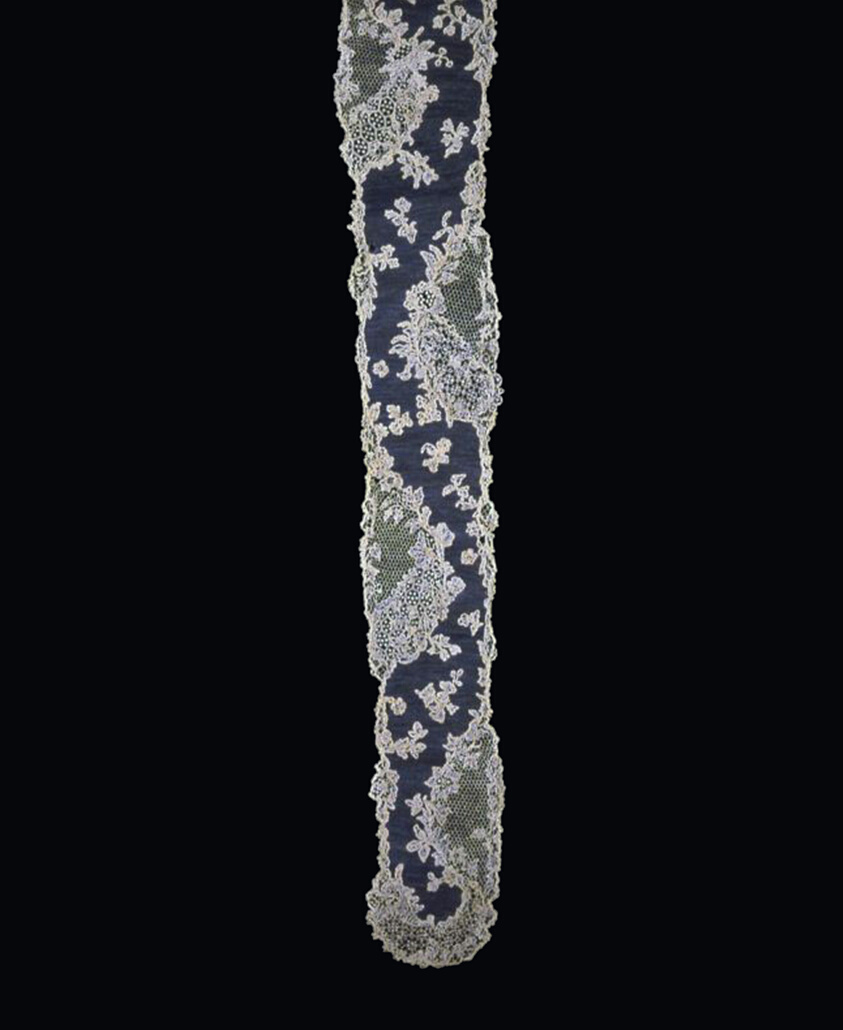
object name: Costume and Accessories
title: Pair of Lappets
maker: France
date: 1750s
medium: Linen, needle lace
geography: France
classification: costume accessory; lace - needle; textile; costume; costume accessory - headdress; costume accessory worn above the waist